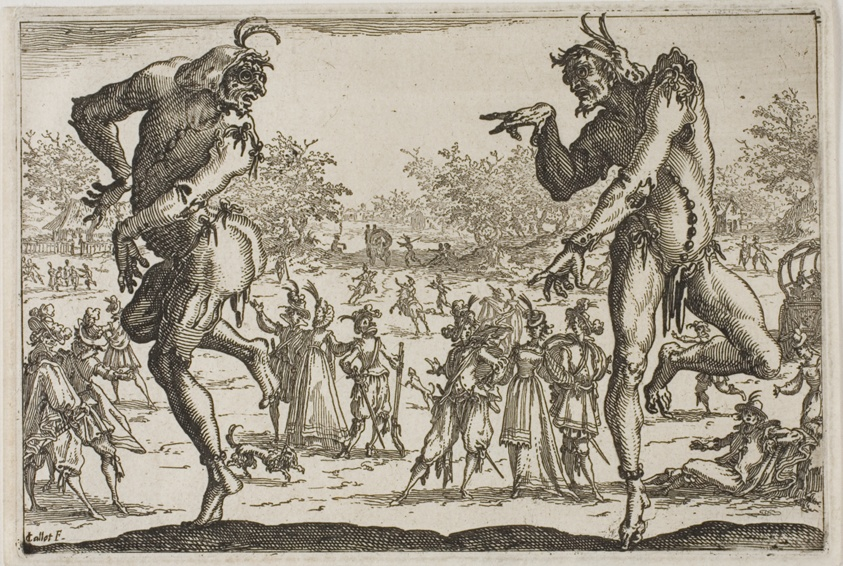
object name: Print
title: The Two Pantaloons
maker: Jacques Callot (French, 1592-1635)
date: 1616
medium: Etching on paper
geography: France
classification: etching; print; prints and drawing